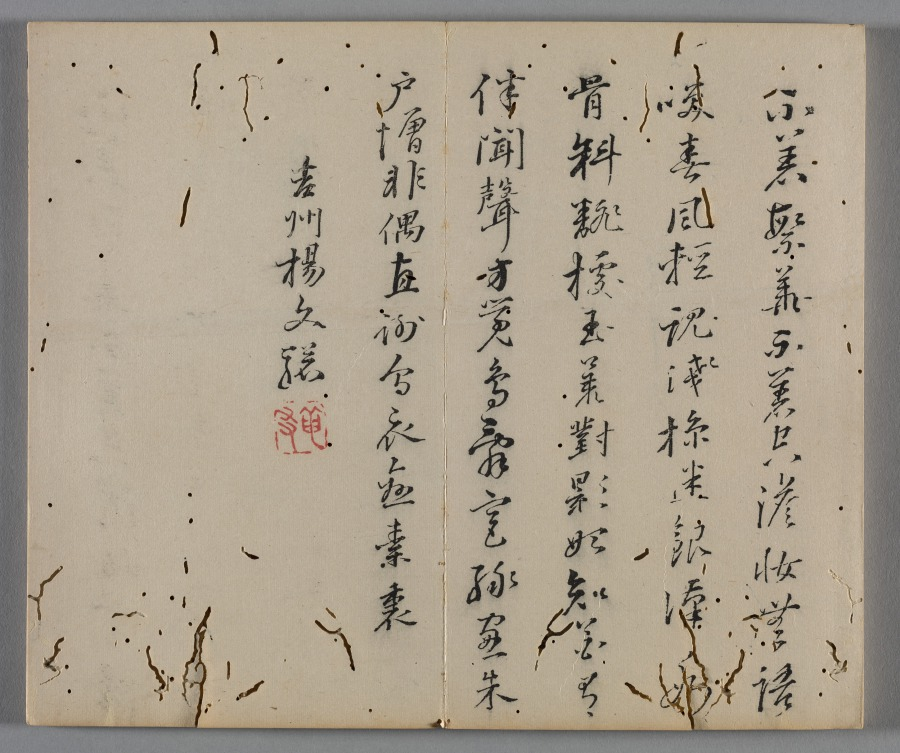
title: Ten Bamboo Studio Painting and Calligraphy Handbook (Shizhuzhai shuhua pu): Birds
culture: China, Qing dynasty (1644-1911)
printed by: Hu Zhengyan (Chinese, c. 1584–1674)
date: 1633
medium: Woodblock-printed book; ink and colors on paper; first edition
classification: Print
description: Color printing reached a level of perfection in the early 1600s, as seen in this Ten Bamboo Studio Collection of Calligraphy and Painting and the Mustard Seed Garden Manual of Painting (printed 1679 and 1701). The painterly quality, precision in registering (aligning) the woodblocks, and harmonious colors made them the most successful color print editions in Chinese history. Both editions were printed and compiled in Nanjing, spread nationwide, and had a great impact on the arts in Japan and Korea.